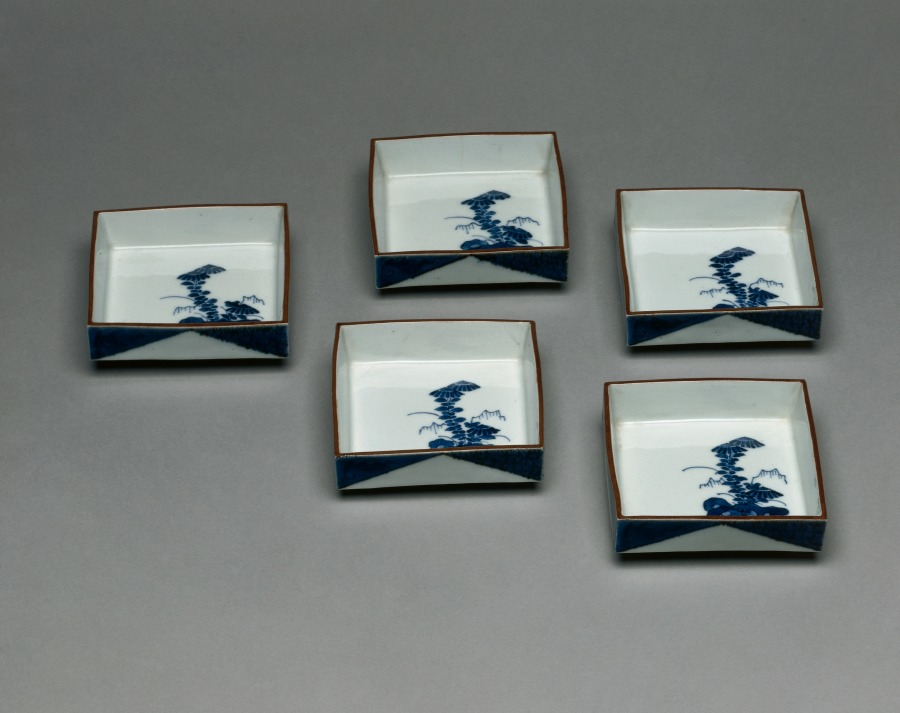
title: Side-Dishes with Dandelion in Rocks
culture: Japan, Edo period (1615–1868)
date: 1700s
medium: Set of five dishes; porcelain with underglaze blue and overglaze iron oxide (Arita ware, Kutani style)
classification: Ceramic